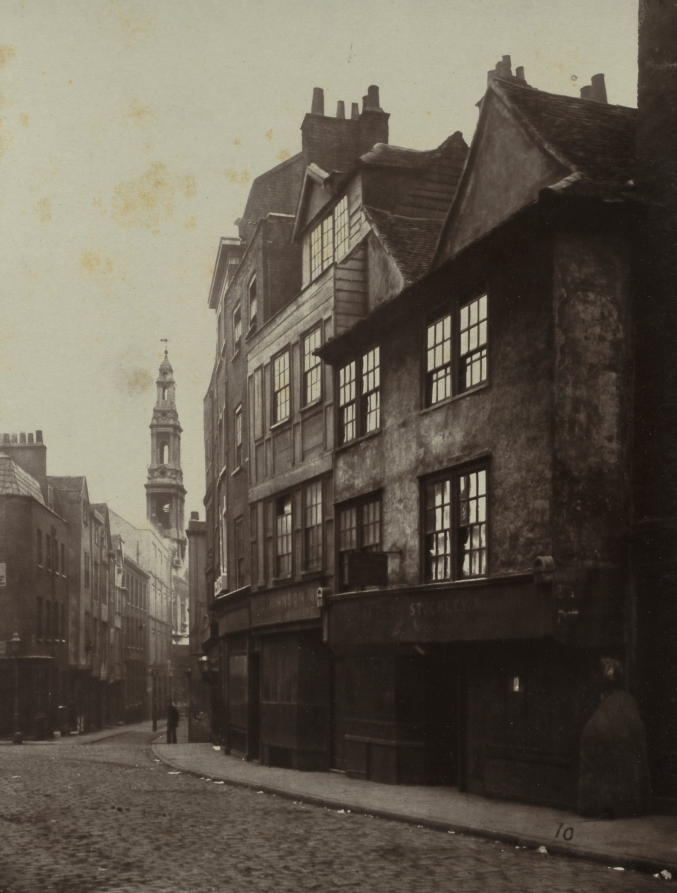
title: Drury Lane Looking towards St. Mary-le-Strand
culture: England, 19th century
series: Old London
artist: Alfred H. Bool (British)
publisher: The Society for Photographing the Relics of Old London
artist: and John Bool (British)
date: 1876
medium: carbon print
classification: Photograph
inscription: Written in ink on recto: "99"; "10"